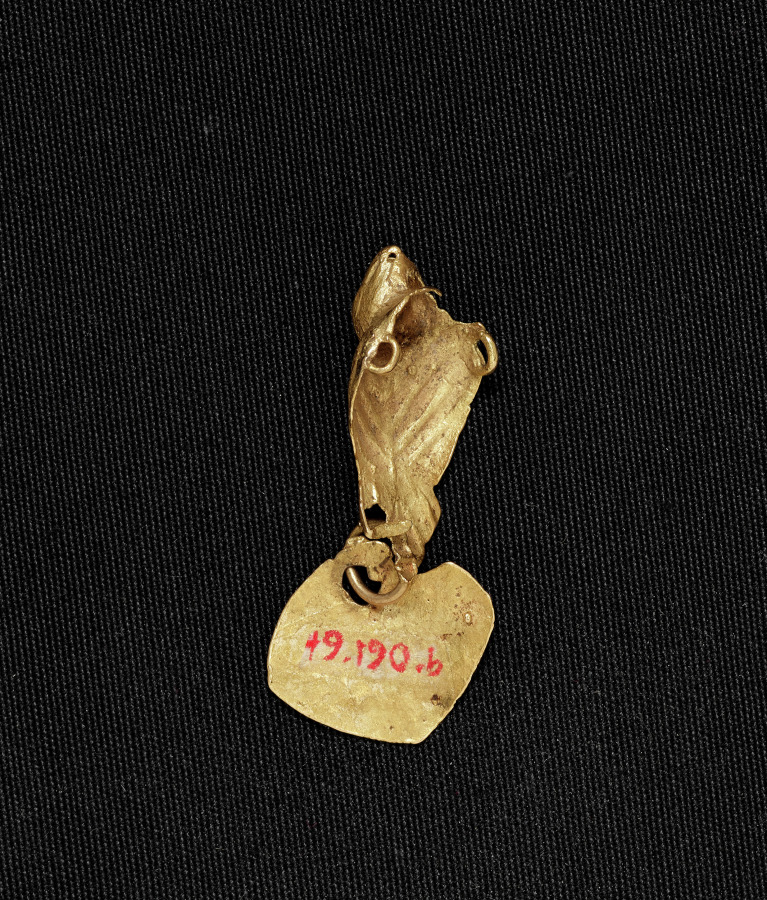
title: Bird Bead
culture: Colombia, Muisca style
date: c. 900–1550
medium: cast gold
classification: Jewelry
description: Muisca metalwork divides into two categories: ornaments to be worn, such as these, and offering figurines, in the case to the right. The elaborate bird pendant features delicate herringbone moldings, openwork patterns, and wing details-all part of the wax model from which the pendant was cast (see nearby computer animation). The dangles were attached after casting.